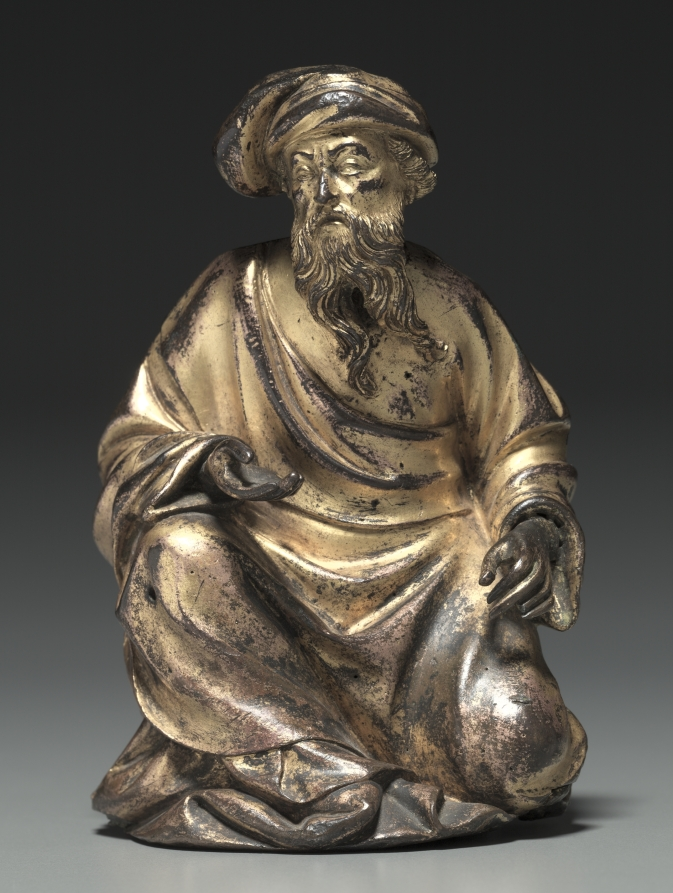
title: Kneeling Prophet from the Reliquary Chasse of Saint-Germain-des-Prés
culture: France, Paris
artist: Jean de Clichy (French)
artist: Gauthier du Four (French)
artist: and Guillaume Boey (French)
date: 1409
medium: gilt bronze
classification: Sculpture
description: This figure is one of only two known surviving fragments of the Reliquary Châsse of Saint-Germain. Fashioned from silver, gold, and precious stones, it was designed to hold the body of the saint. A contract from 1409 gives the names of the commissioned goldsmiths: Jean de Clichy, Gautier du Four, and Guillaume Boey.The reliquary was housed in the ancient Benedictine Abbey of Saint-Germain-des-Prés in Paris and formed the monastery’s great treasure until it was destroyed in the French revolution. The exquisite modeling of the prophet, originally a supporting foot of the reliquary, reveals the sophistication of Paris around 1400.